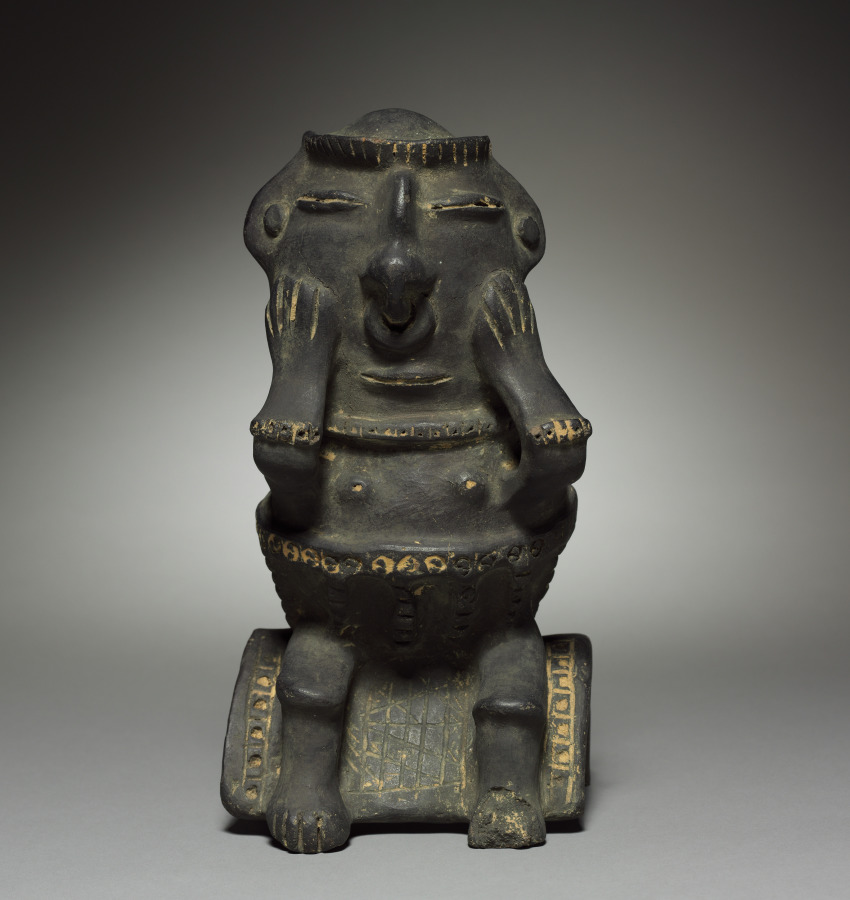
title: Seated Figure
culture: Colombia, Pre-Columbian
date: before 1921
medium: earthenware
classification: Ceramic